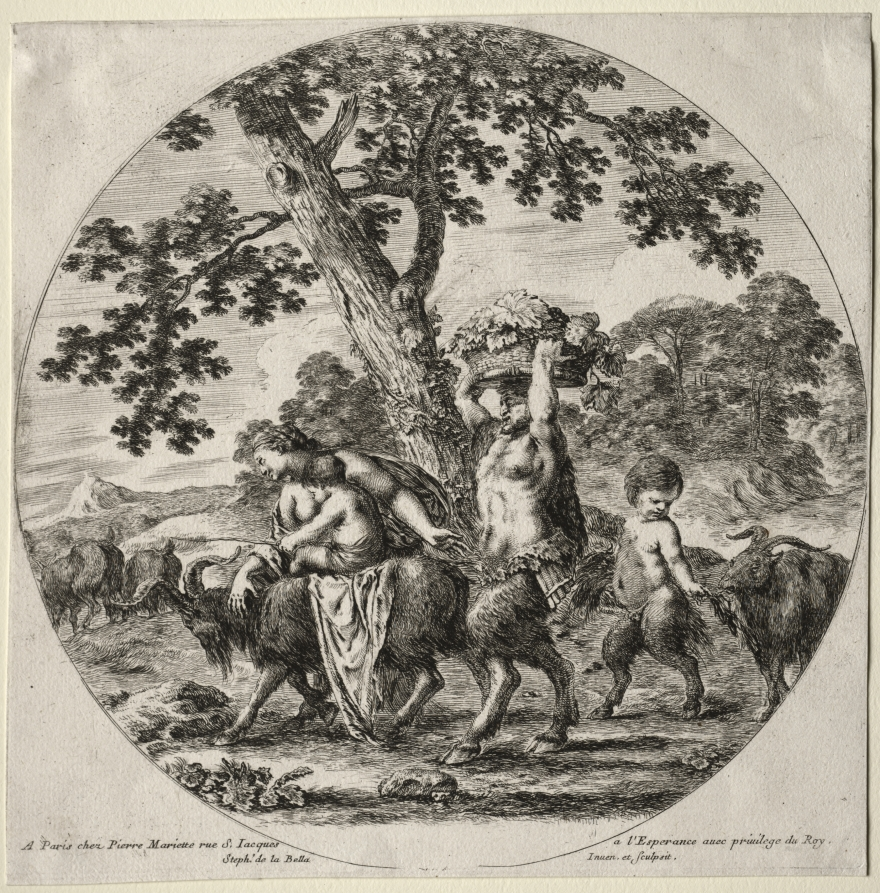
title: A Satyr Family Traveling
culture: Italy, 17th century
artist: Stefano Della Bella (Italian, 1610–1664)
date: c. 1657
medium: etching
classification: Print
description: The idea of a satyr family captured the imagination of many artists. Stefano Della Bella’s portrayal features a father and mother who travel with their satyr son, maenad daughter, and a herd of goats while carrying a grape harvest. Della Bella deliberately evoked images of Jesus, Mary, and Joseph on their flight to Egypt. Whereas the Holy Family is sacred and chaste, the satyr family is rooted in bodily pleasures. Theirs is a union fueled by wine and revelry, embodying the reckless fertility of nature.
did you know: The patriarch of this satyr family carries a pan flute on his hip. Named for Pan, shepherd god and friend of Bacchus in classical mythology, the pan flute was associated with pastoral settings.